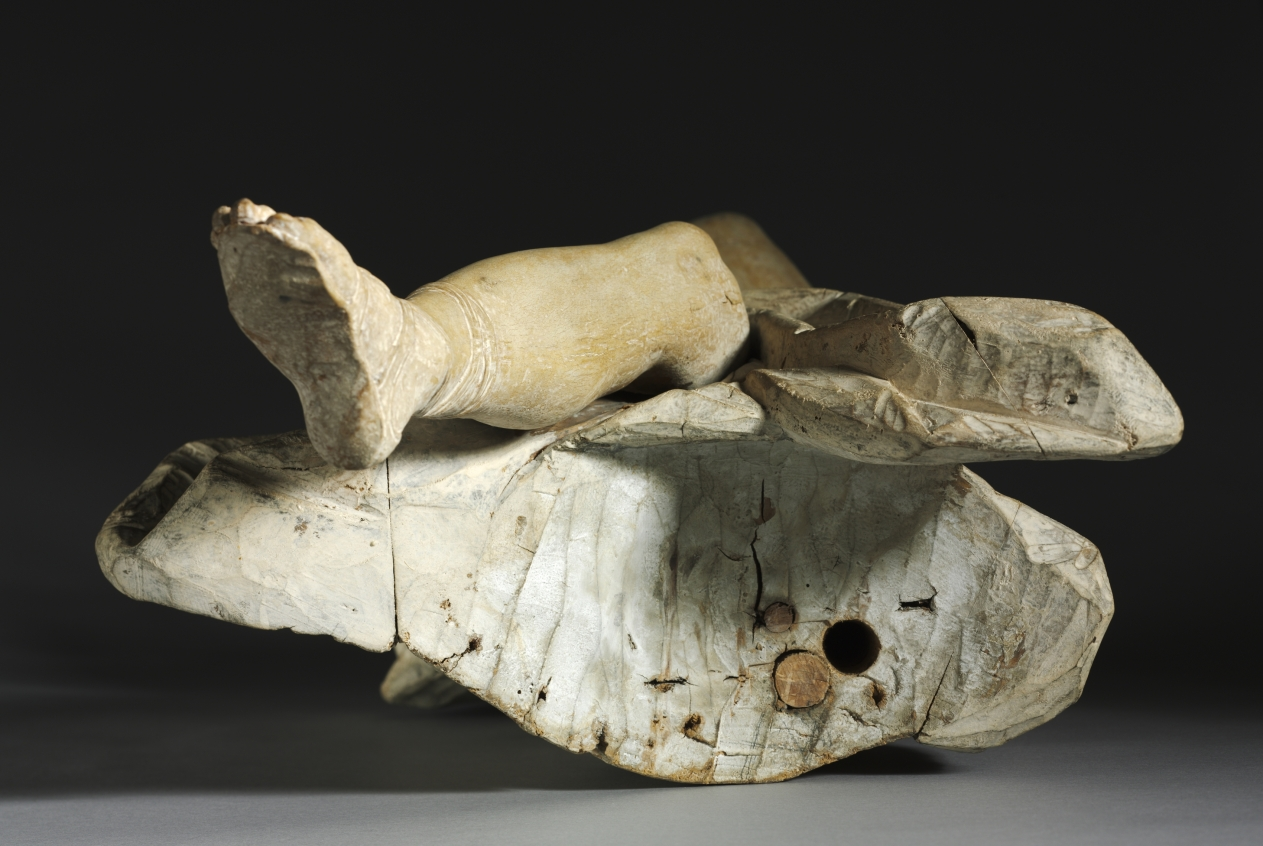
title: Kneeling Angel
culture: Germany, Munich, 18th century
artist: Ignaz Günther (German, 1725–1775)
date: c. 1760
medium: gessoed and painted wood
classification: Sculpture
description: This angel, and another now in the Philadelphia Museum of Art, were probably originally placed on either side of a tabernacle—a structure designed to hold the consecrated bread and wine of the Eucharist—on an altar in a Christian church or private chapel. The angels would originally have had wings, and the now plain surface of the sculpture would have been painted or gilded. Ignaz Günther was among the most sought-after carvers of religious sculpture in southern Germany. His virtuoso skill is particularly evident here in the angel’s pious expression and elegantly formed hands and feet.